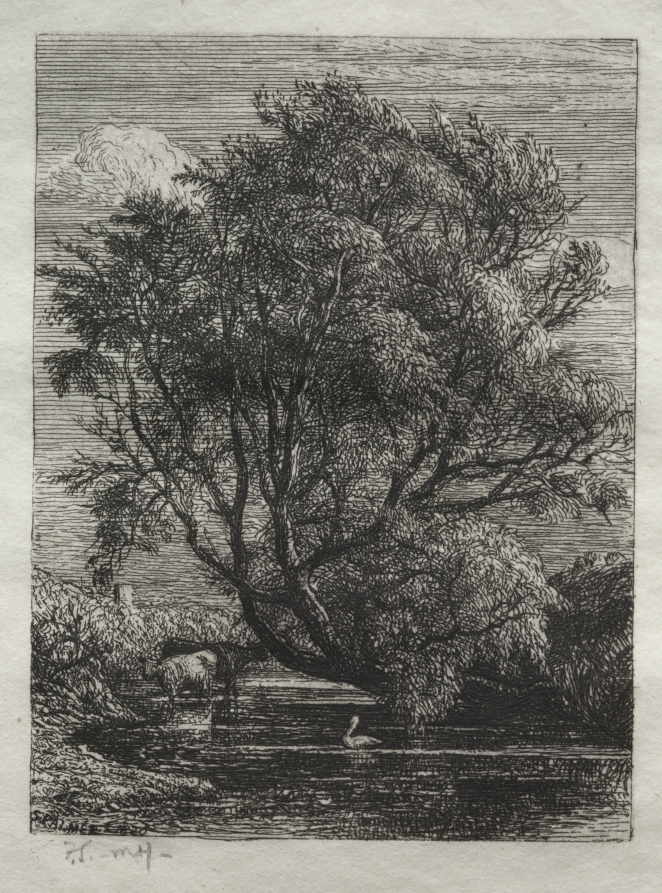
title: The Willow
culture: England, 19th century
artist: Samuel Palmer (British, 1805–1881)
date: 1850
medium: etching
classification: Print